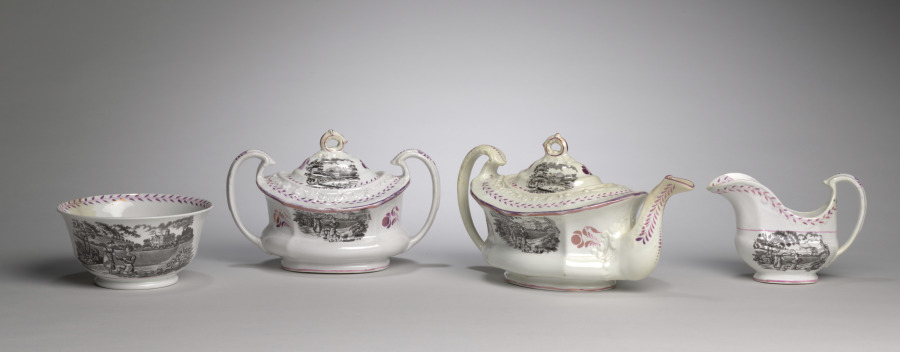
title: Tea Service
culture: England, 19th century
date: c. 1800–1825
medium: earthenware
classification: Ceramic